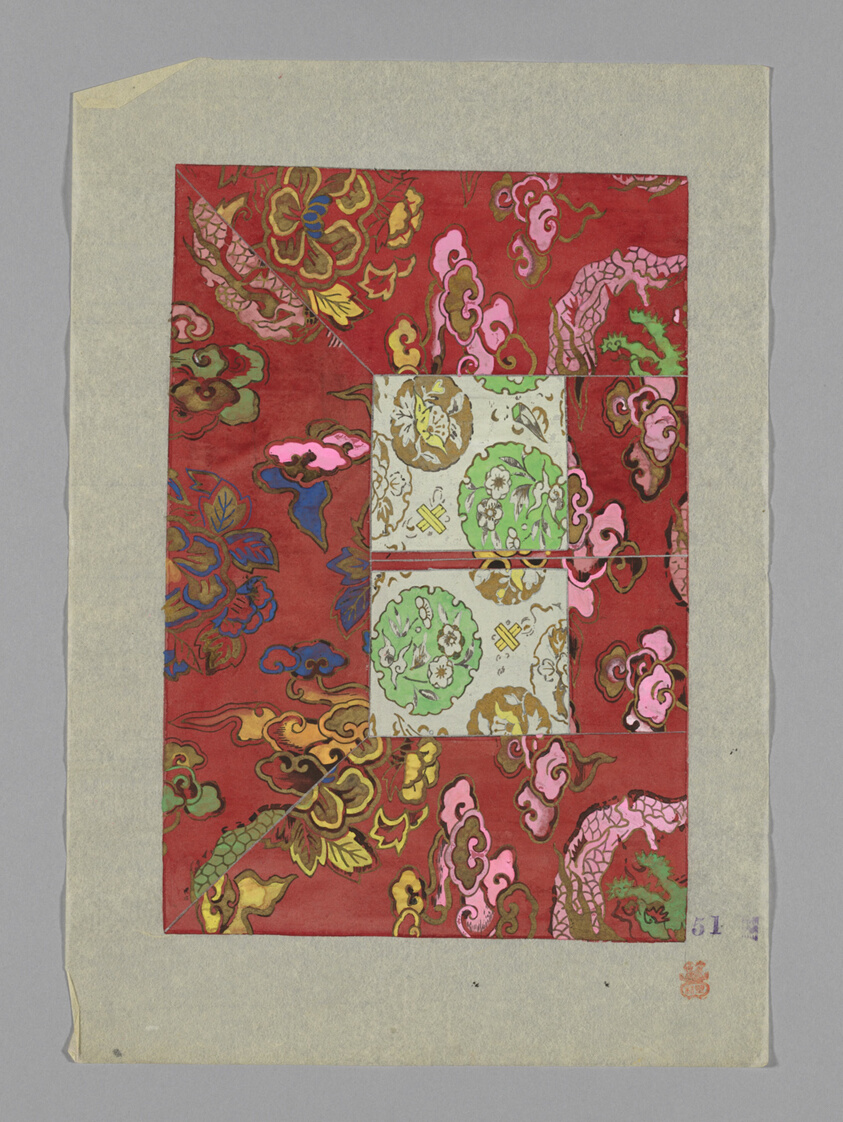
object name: Drawing and Watercolor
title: Design on Paper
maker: Japan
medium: Paper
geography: Japan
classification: textile; accessory - paper design; watercolor; paper